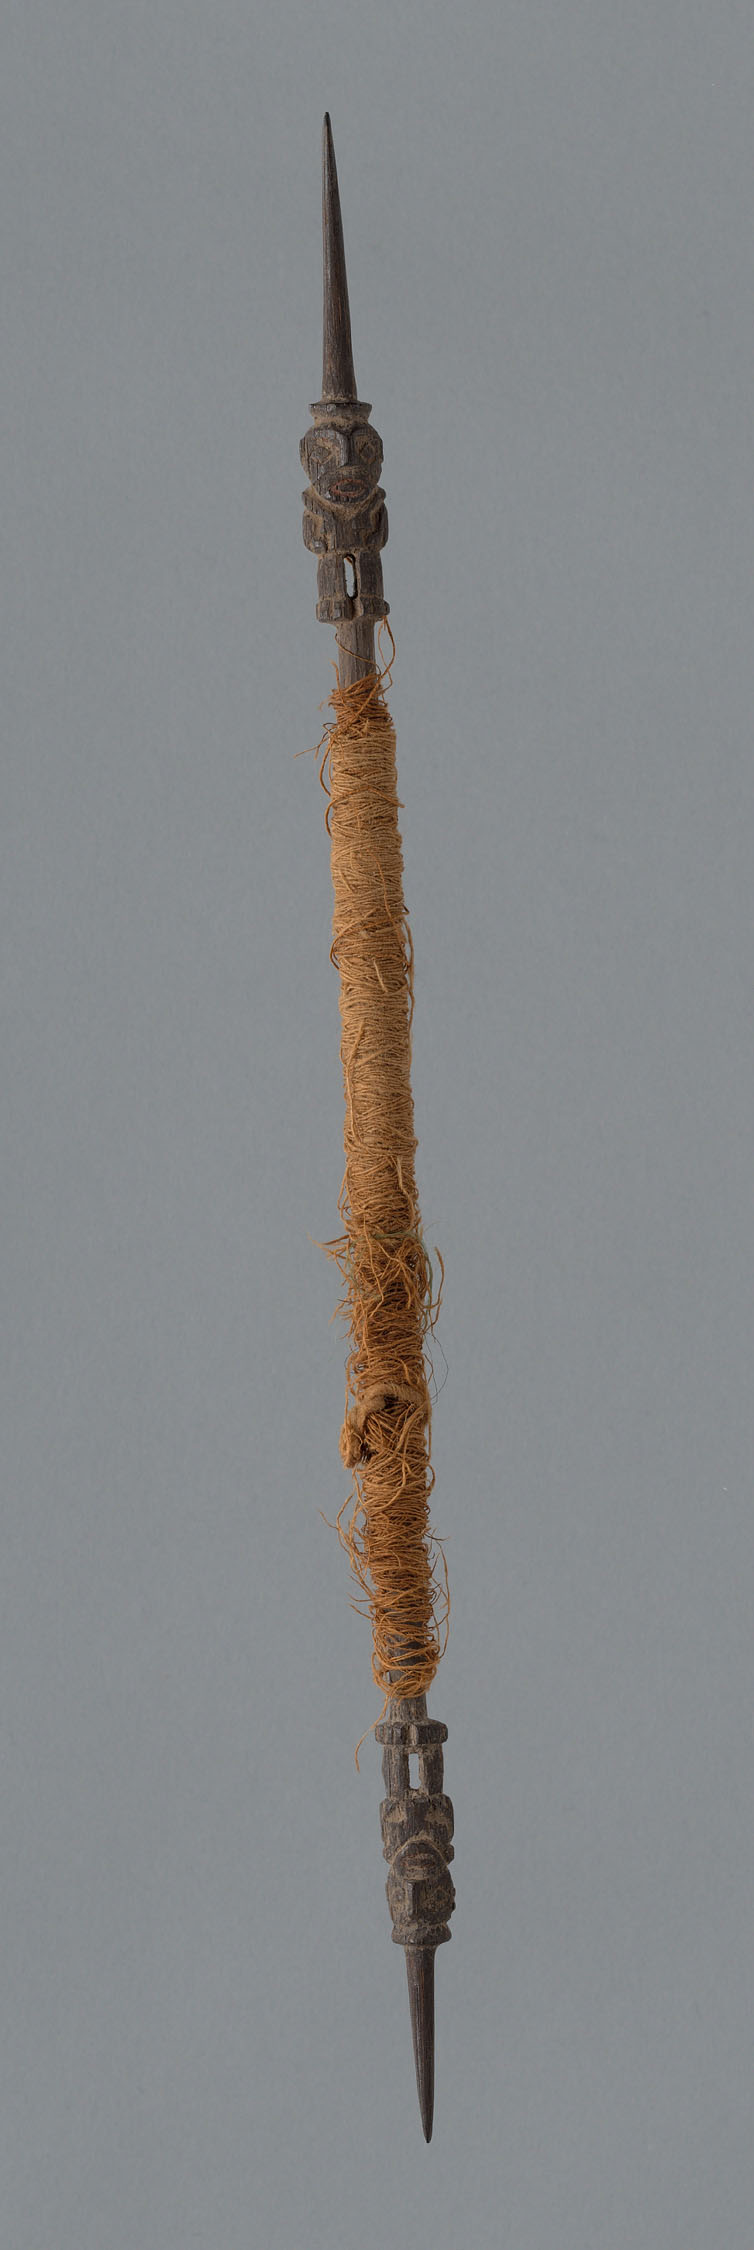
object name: non-art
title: Wooden Spindle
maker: Peru, Possibly central coast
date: 1000/1476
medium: Wood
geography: Peru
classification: spindles (textile working equipment); accessories (object genre); textile working equipment; textile